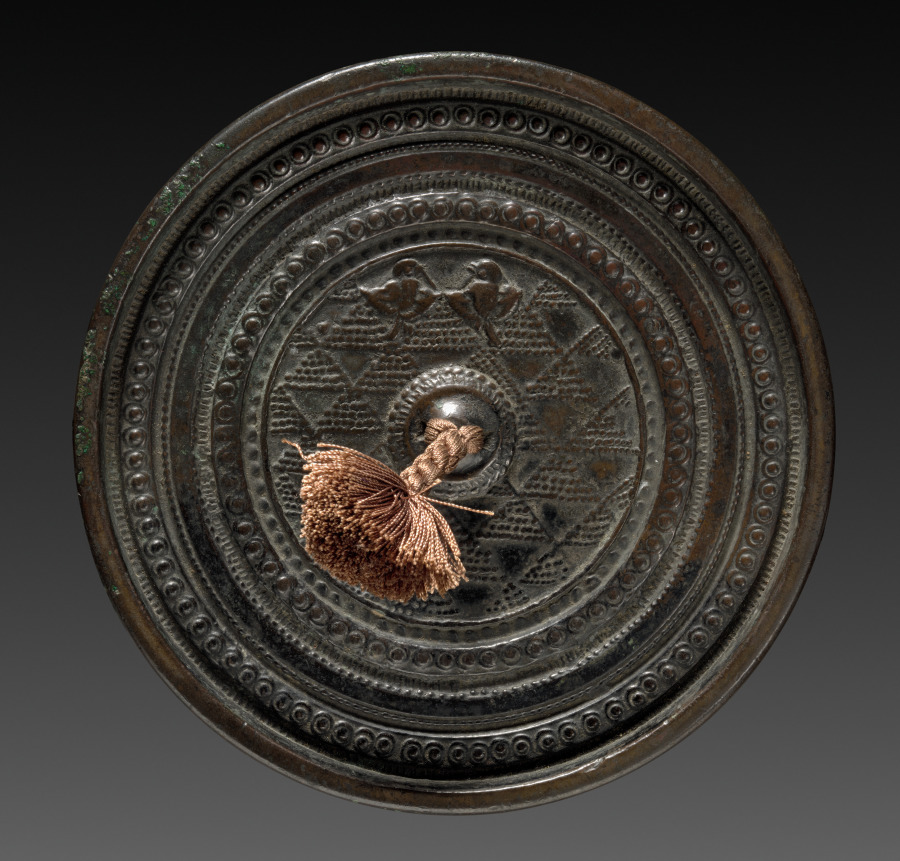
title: Mirror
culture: Japan, Muromachi period (1392–1573)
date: 1392–1573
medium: bronze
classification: Metalwork